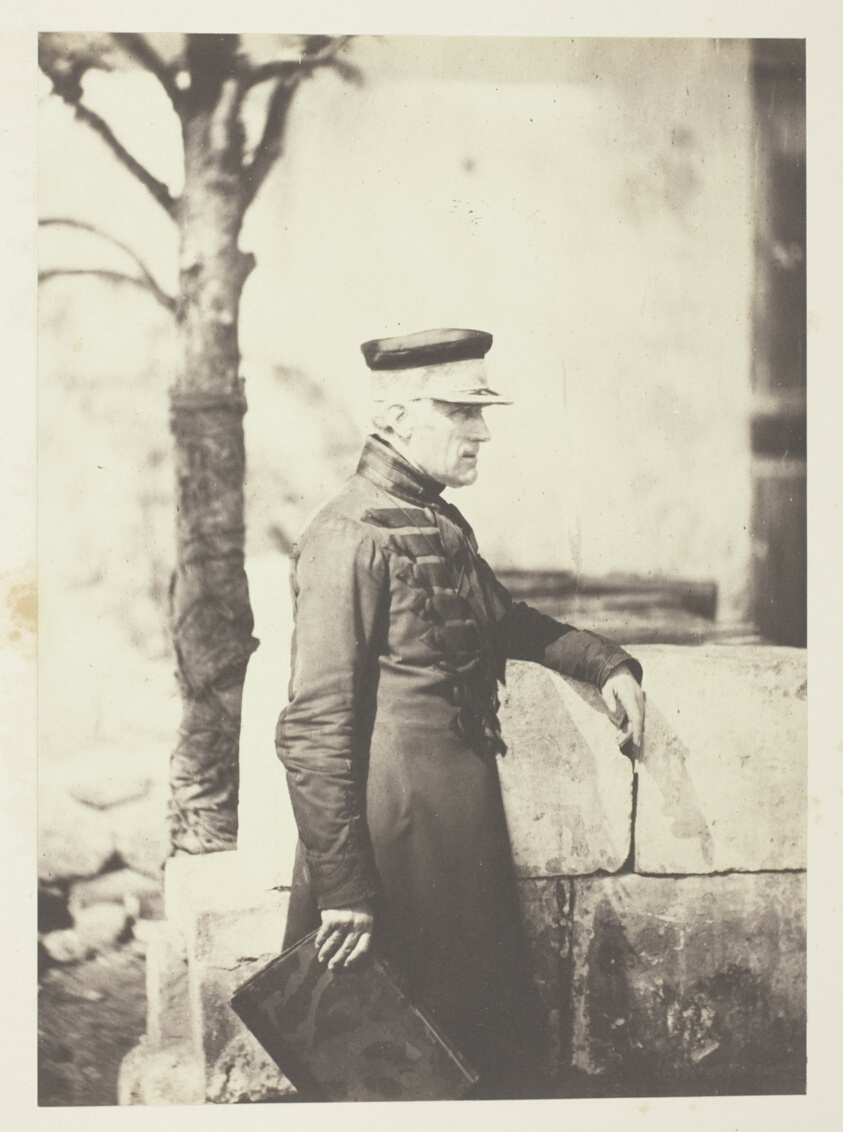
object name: Photograph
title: Lieutenant General Sir Harry Jones, K.C.B.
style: 19th century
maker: Roger Fenton (English, 1819–1869)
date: 1855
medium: Salted paper print, plate 42 from the album "Photographs Taken in the Crimea" (1856)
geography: England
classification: salted paper print; photographic process; photography; photograph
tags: Collected by Hugh Edwards, Crimea 1856